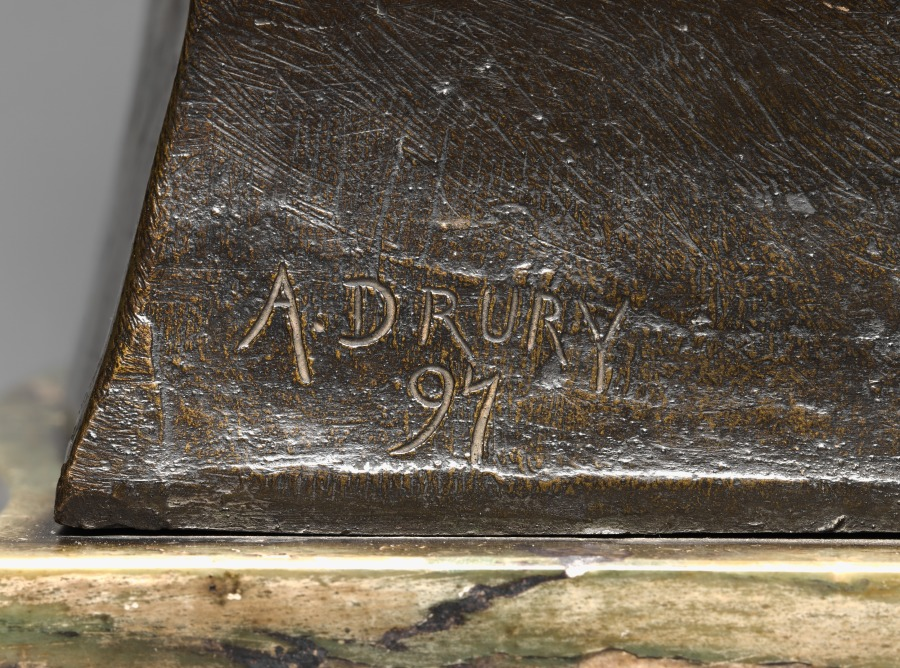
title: The Age of Innocence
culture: England, 19th century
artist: Alfred Drury (British, 1856–1944)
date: 1897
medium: bronze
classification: Sculpture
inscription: signed and dated: A. DRURY 97.